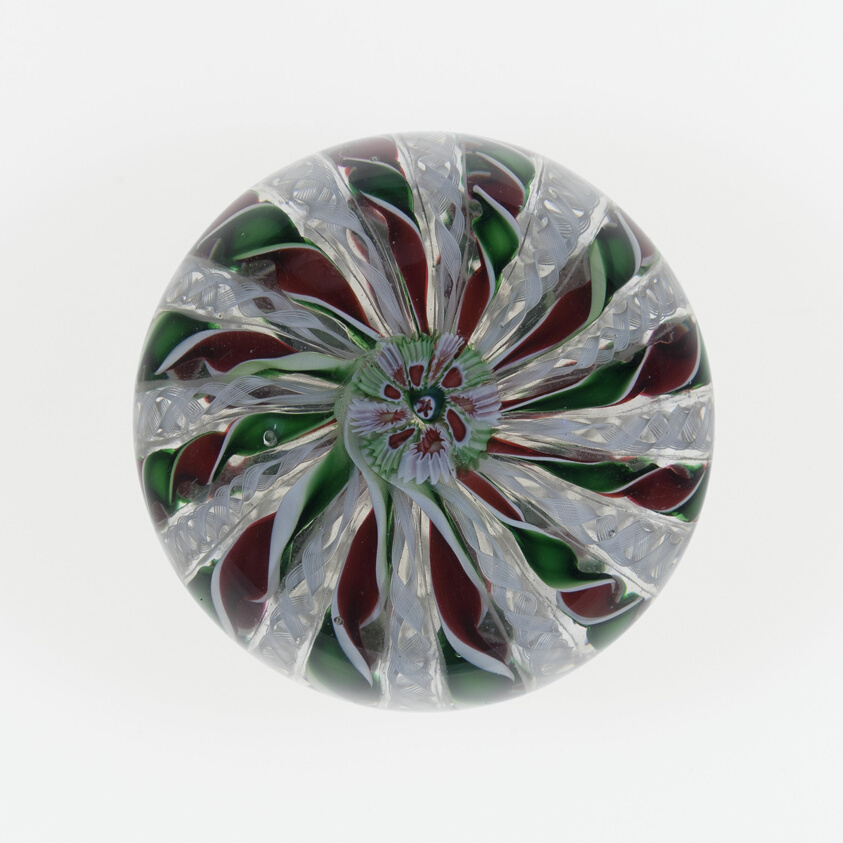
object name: Glass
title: Paperweight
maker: Saint-Louis Glassworks (Cristalleries de Saint-Louis); Lorraine, France, founded 1586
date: c. 1845–60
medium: Glass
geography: Saint-Louis-lès-Bitche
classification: paperweight; glass